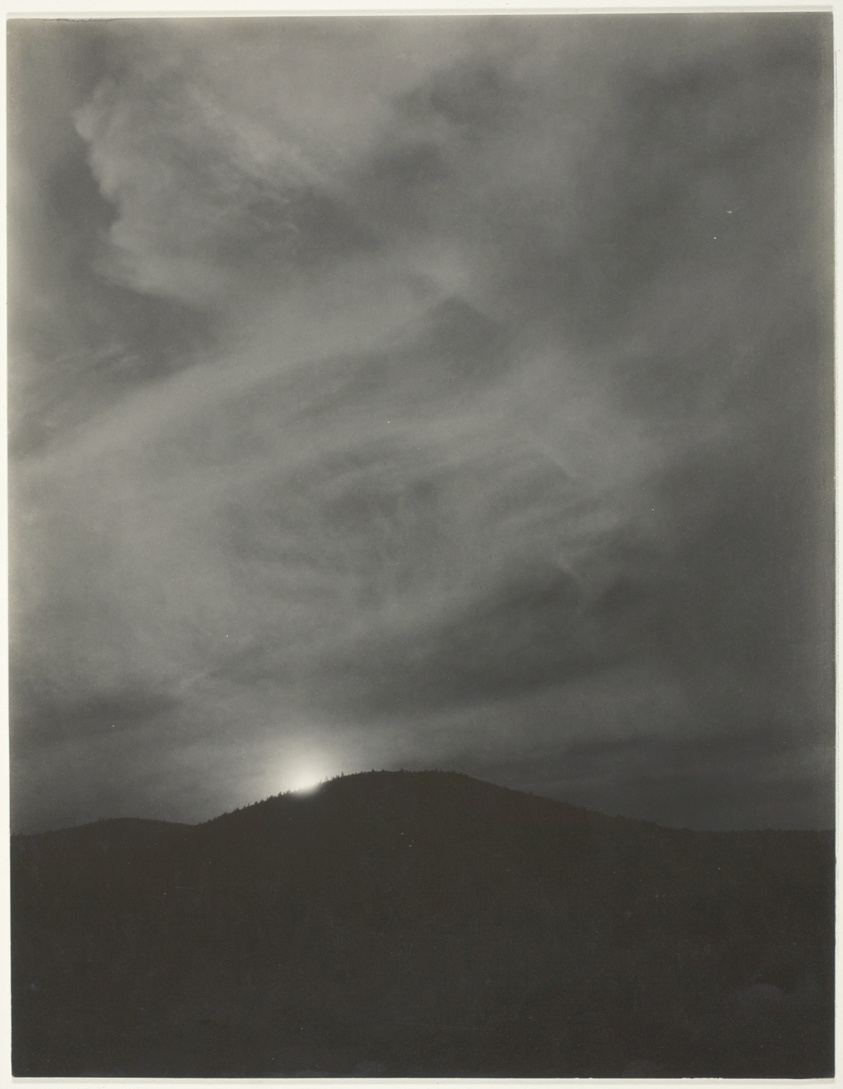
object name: Photograph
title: Lake George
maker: Alfred Stieglitz (American, 1864–1946)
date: c. 1922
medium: Gelatin silver print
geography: United States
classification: gelatin silver (developing-out-paper) pr; photographic process; photography; photograph